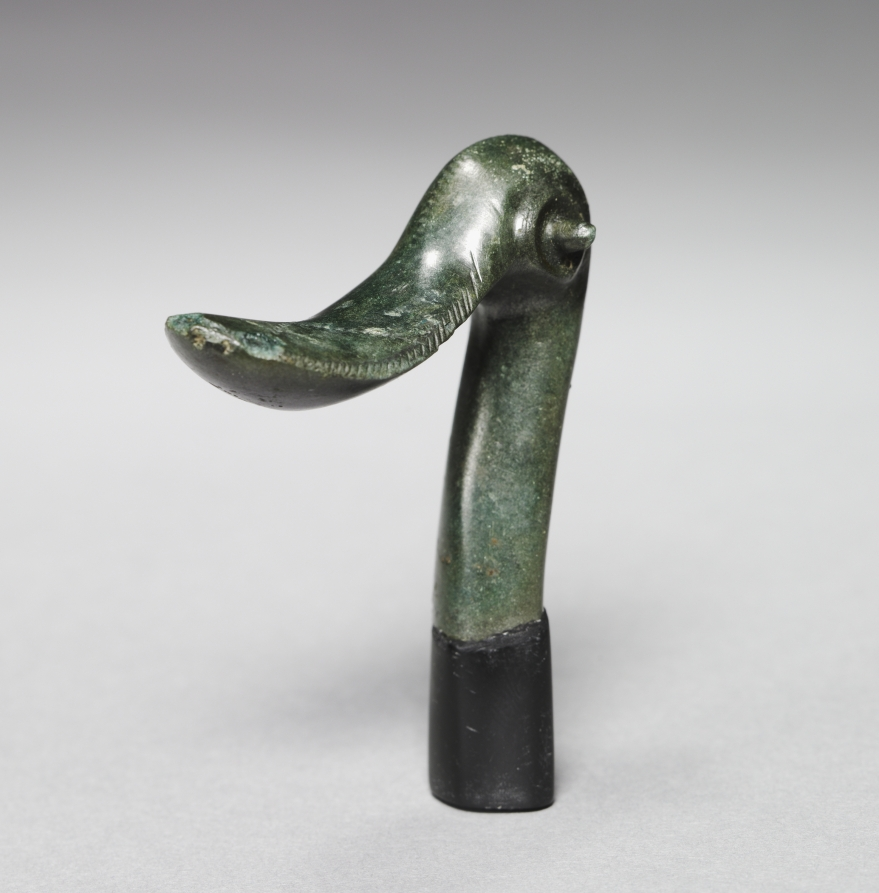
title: Duck Head Finial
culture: possibly Hungary, Bronze Age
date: c. 1400–1300 BCE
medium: bronze, cast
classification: Sculpture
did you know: A decorative object, this duck head finial likely topped a piece of furniture.